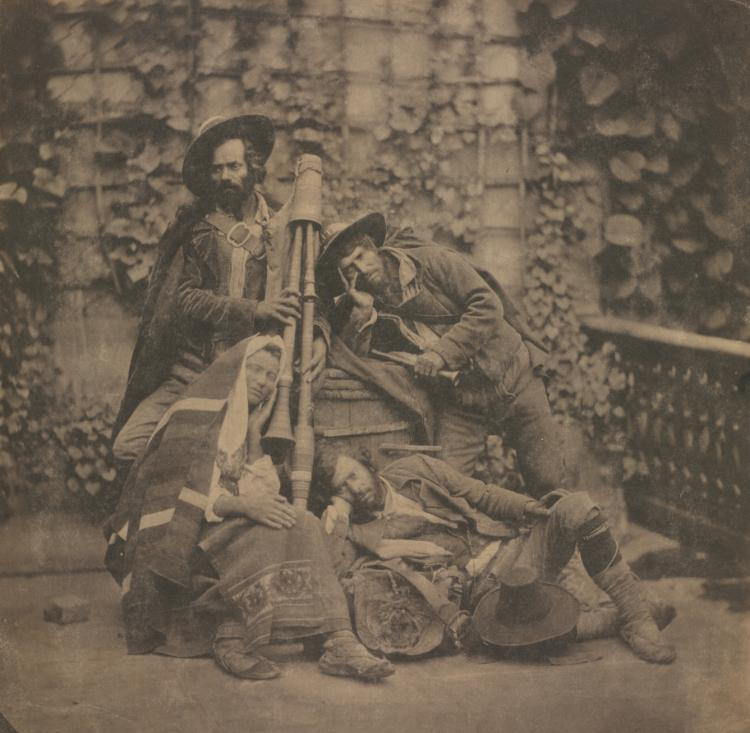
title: Untitled (Pifferari)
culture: France or Italy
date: c. 1851–55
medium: salted paper print from wet collodion negative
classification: Photograph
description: Taken to catalogue and document cultural practices, photographs such as this one were intended as portraits of professions or ethnographic types rather than portraits of individuals. An unidentified photographer captured the picturesque pifferari, country musicians who wandered European cities around Christmas playing before images of the Virgin and on the streets. They were a common theme for French and Italian painters and photographers in the 1840s and 1850s.